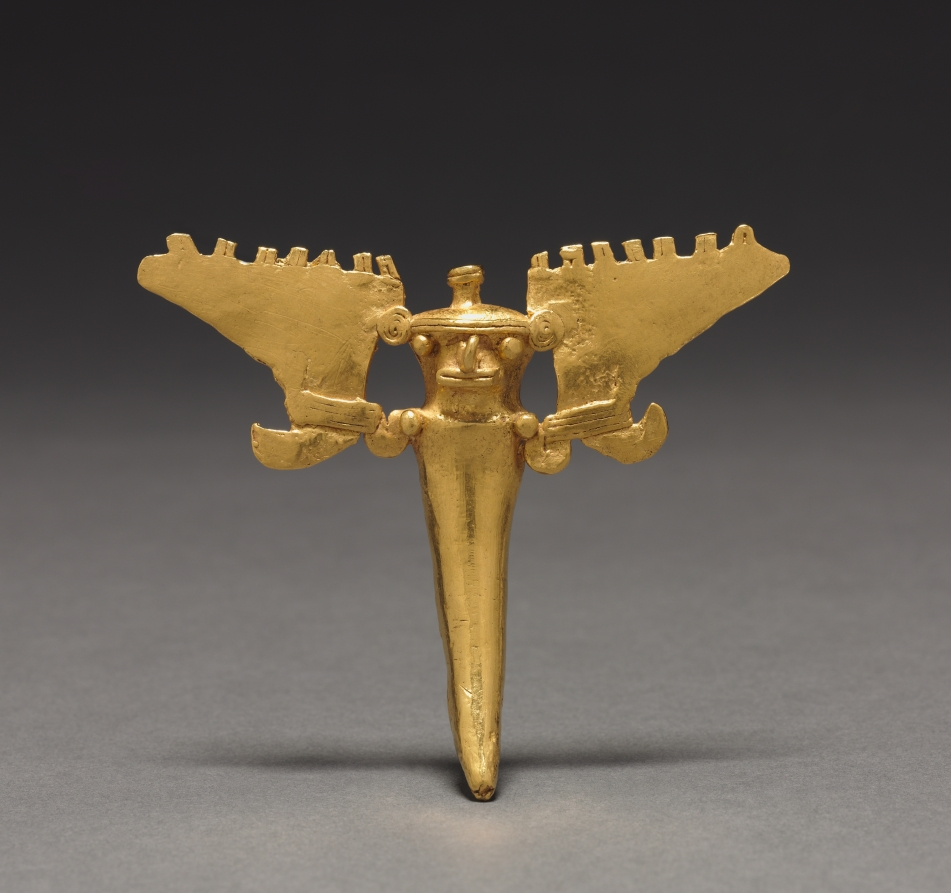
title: Tusk Figural Pendant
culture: Western Panama, Veraguas-Gran Chiriquí Style, c. 1000-1550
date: c. 1000–1550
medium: cast and hammered gold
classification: Metalwork